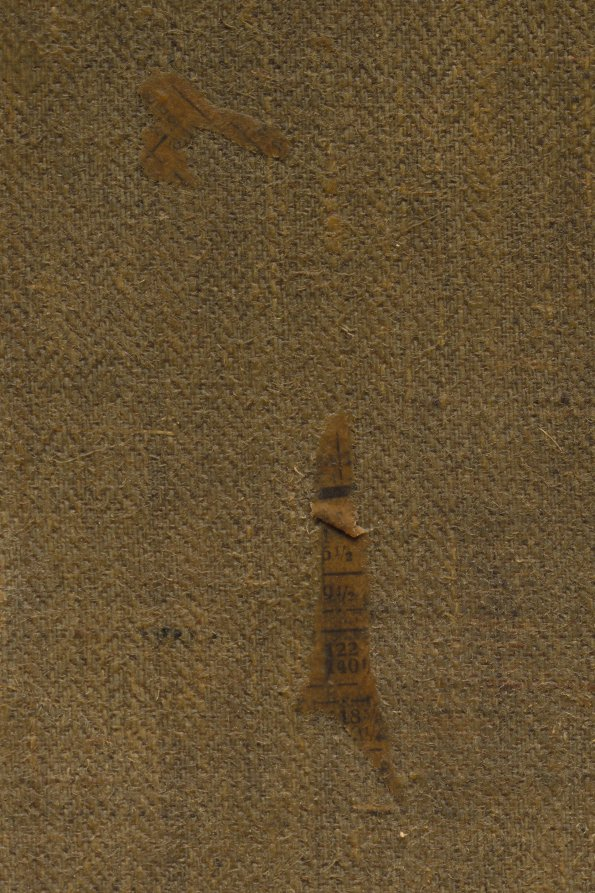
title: Silver Wine Jug, Ham, and Fruit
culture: Netherlands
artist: Abraham van Beyeren (Dutch, 1620/21–1690)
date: c. 1660–66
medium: oil on canvas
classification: Painting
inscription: Signed lower left: "AVB g. [monogram]"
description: With their typically large scale, and loose and energetic brushwork, Abraham van Beyeren’s opulent still life paintings were designed to be seen from a slight distance—perhaps installed over a mantelpiece. Here, for example, the silver wine jug is painted with rough strokes that seem almost abstract when viewed up close, but from a distance it becomes a fully realized object shimmering with complex reflections—including a ghostly self-portrait of the artist at his easel.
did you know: Look closely: the shimmering surface of the silver wine jug reflects a portrait of the artist at his easel.